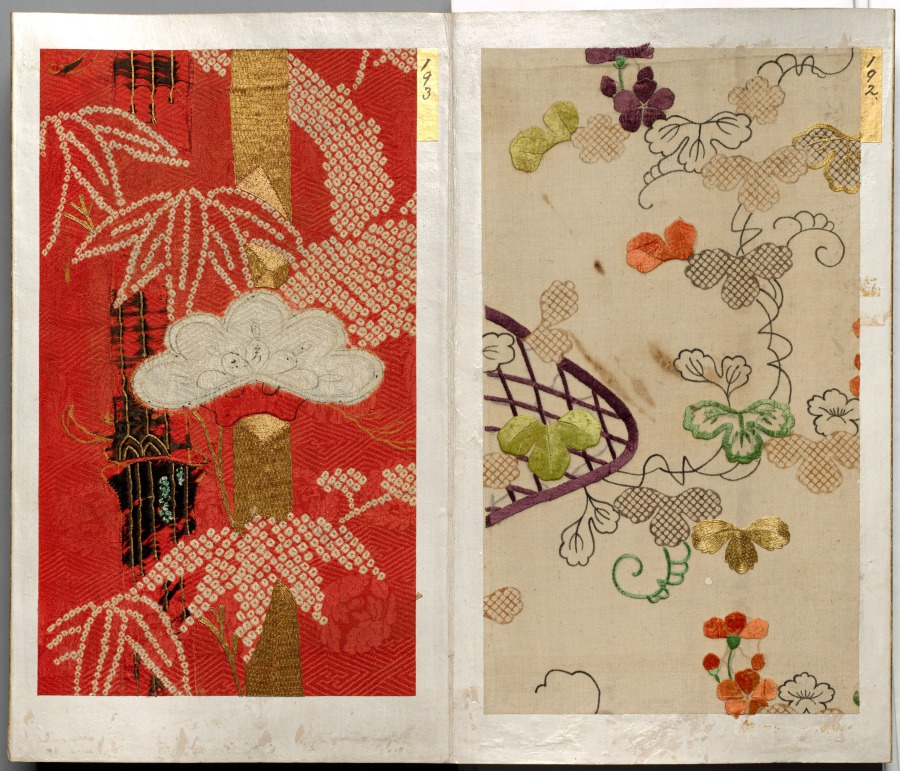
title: Album of Textile Samples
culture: Japan, Edo period (1615–1868)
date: 1600s-1700s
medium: silk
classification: Textile